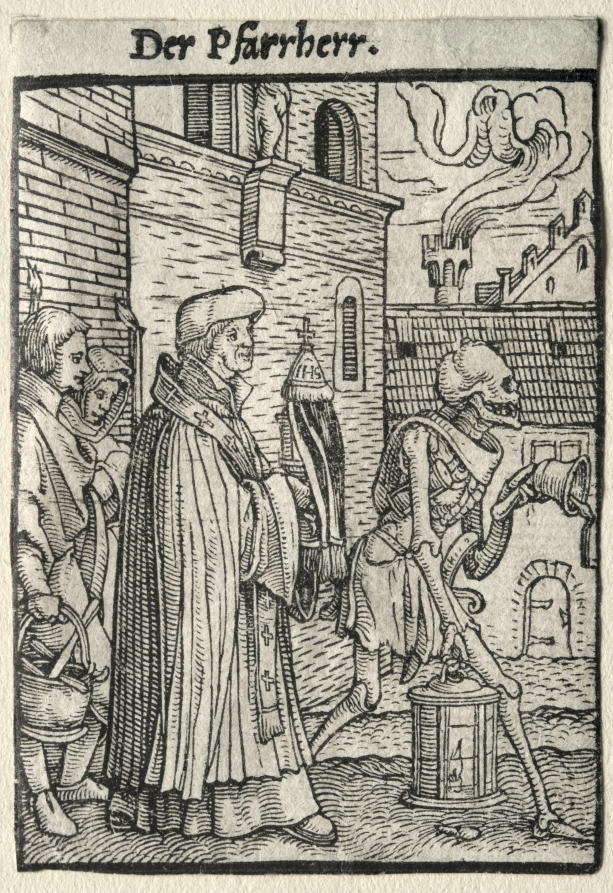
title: Dance of Death: The Pastor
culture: Germany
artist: Hans Holbein the Younger (German, active England and Switzerland, 1497/98–1543)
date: c. 1526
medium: woodcut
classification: Print